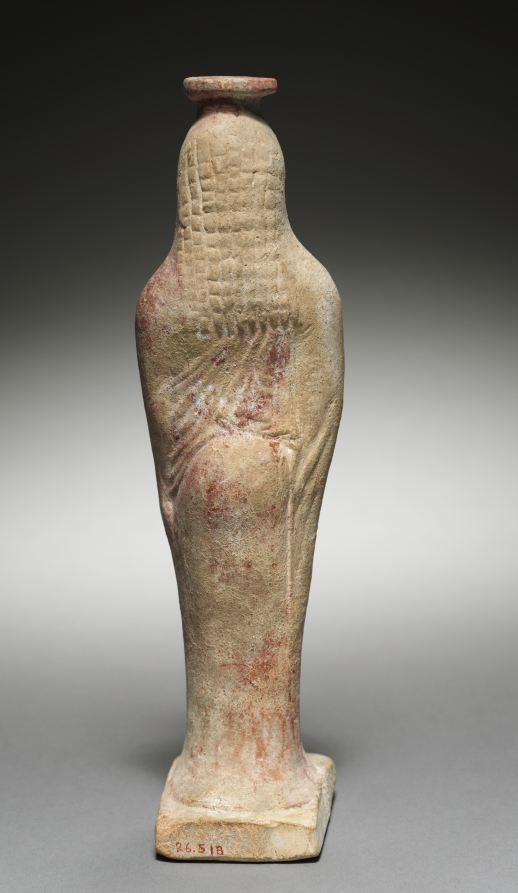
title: Kore-Shaped Perfume Flask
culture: Greece, Rhodes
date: 525–500 BCE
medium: terracotta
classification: Sculpture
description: Mold-made in the form of a standing maiden, or kore, this vessel likely once held expensive perfumed oil. The figure, who might represent the goddess Aphrodite, holds a dove by her chest with one hand, and her pleated drapery in the other. Traces of red pigment hint at a much more vibrant original appearance.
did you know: In ancient Greece, doves were symbols of beauty and love, associated with the goddess Aphrodite.